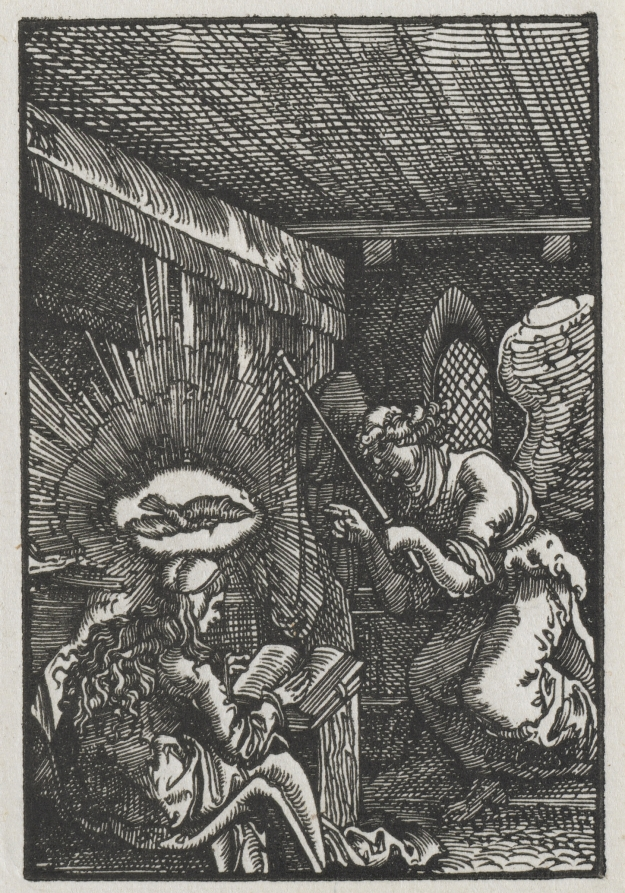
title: The Fall and Redemption of Man: The Annunciation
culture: Germany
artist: Albrecht Altdorfer (German, c. 1480–1538)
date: c. 1513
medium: woodcut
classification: Print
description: These eight woodcuts come from a series of forty which illustrate the story of Christian redemption from original sin to the Last Judgement. Probably to maximize printing efficiency and quality, eight woodblocks were printed on each of five sheets of paper, but the subjects are not in the correct chronological order. Prior to sale, the sheets were cut into eight pieces. The sheets in the museum's set were only cut in half, preserving four prints per page. The numbers after the titles of the individual images indicate each scene's place within the narrative. By 1513, Altdorfer had already executed a number of small, finely detailed engravings. Because it is difficult to achieve the same degree of precision using woodcut, The Fall and Redemption of Man is a technical tour de force. Probably inspired by Albrecht Dürer's Small Passion (1511)-but almost double the size-the only contemporaneous comparable set of fine miniature woodcuts, Dance of Death, was designed by Hans Holbein in about 1526 (on view nearby).